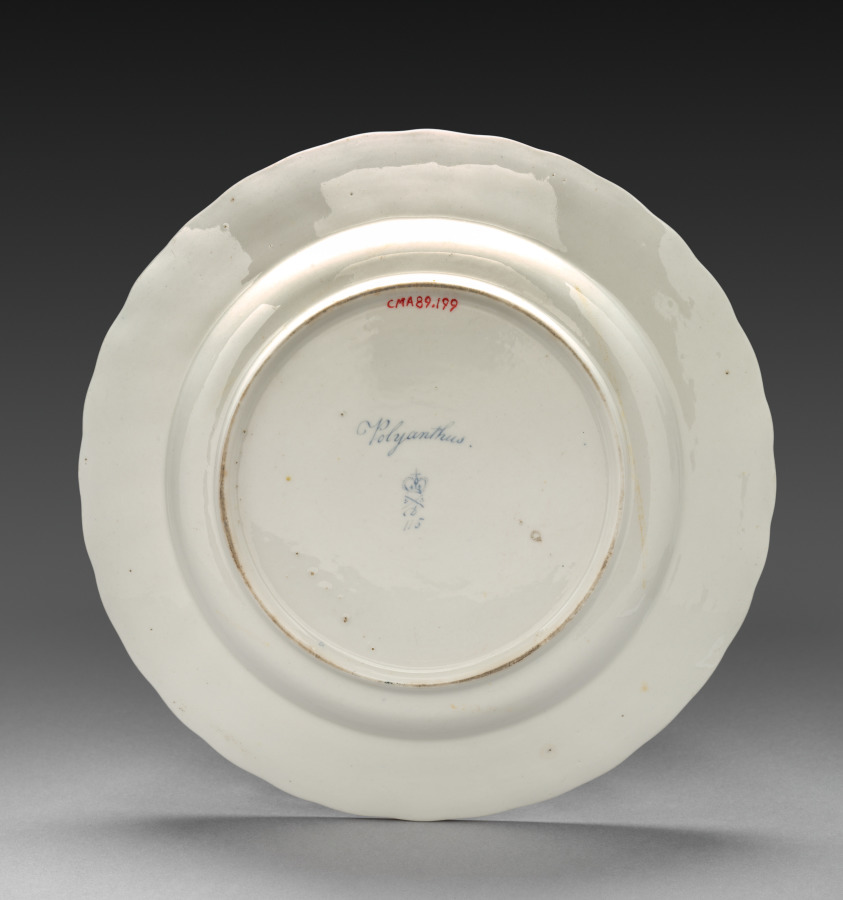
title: Plate from Dessert Service: Polyanthus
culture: England, Derby, 18th century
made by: Derby (Crown Derby Period) (British)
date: c. 1800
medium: porcelain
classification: Ceramic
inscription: inscribed in blue on back: Polyanthus./crown/crossed batons and dots/D/115.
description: Each dish is decorated with recognizable plants, the names of which are inscribed on the base in both Latin and English. Identifying the blossoms only became customary in the late 18th century when a single piece of porcelain was decorated with one species, and flowers were represented along with leaves, stems, seed pods, and roots. All of this reflects Carolus Linnaeus’s recent invention of a scientific method to categorize all known flora. The decorations on the Derby factory’s products derive from contemporary English botanical publications. For instance, illustrations in William Curtis’s The Botanical Magazine served as models for the French marigold and nettle-leaved bell flower on the dessert service.